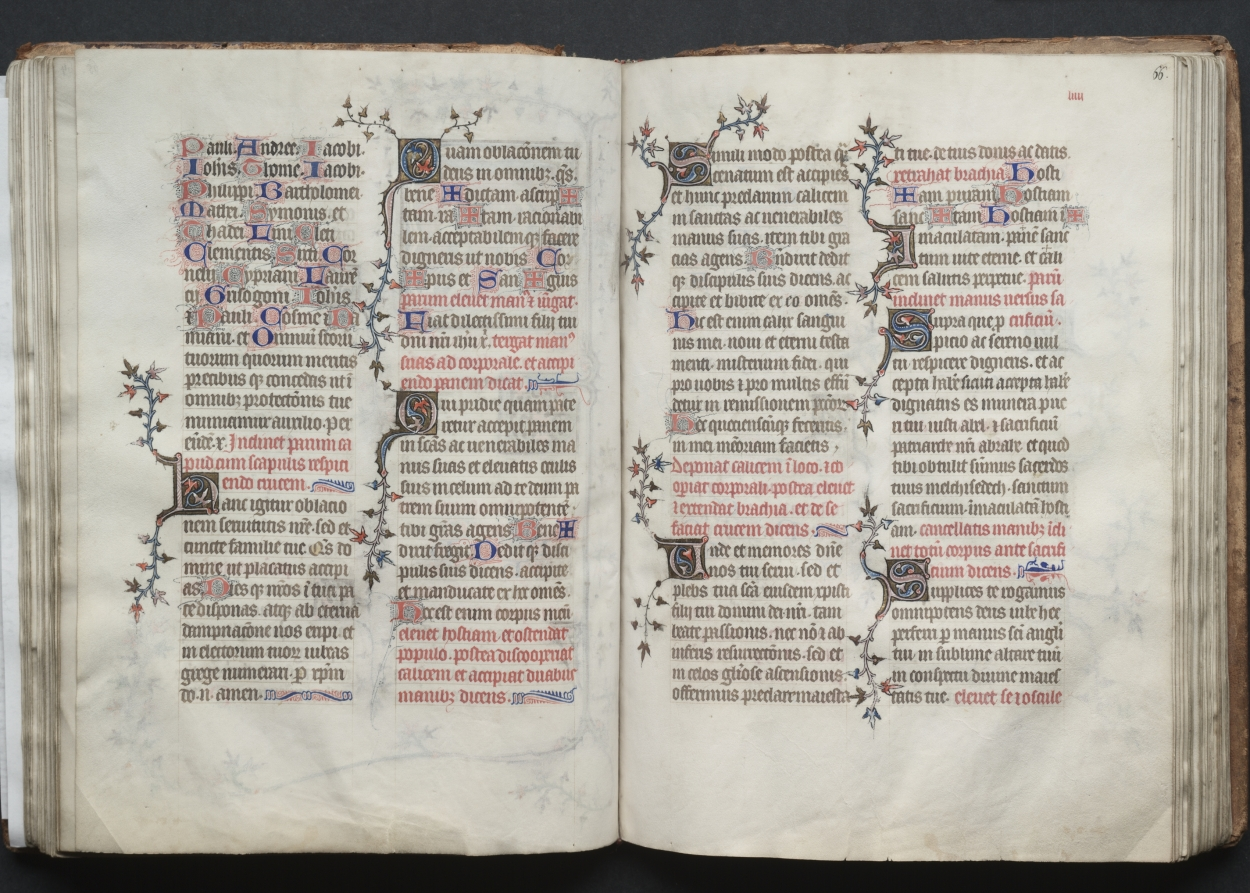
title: The Gotha Missal: Fol. 65v, Text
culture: France, Paris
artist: Master of the Boqueteaux (French)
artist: and Workshop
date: c. 1375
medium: ink, tempera, and gold on vellum; blind-tooled leather binding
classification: Bound Volume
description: The style and quality of this manuscript's decoration is typical of deluxe Parisian books made for aristocratic or royal patrons. Most of the book's decoration appears to be the work of the Master of the Boqueteaux, an artist active at the court of King Charles V (died 1380). His style was apparently shared by a number of book illuminators working in and around Paris. It is very possible that the Gotha Missal belonged to Charles V, but is not provable because the manuscript has no royal portraits and lacks a colophon. Given the book's magnificent decoration, however, it would seem that it was produced for a Valois prince, if not for the king himself. The manuscript receives its name from the German dukes of Gotha, its later owners.